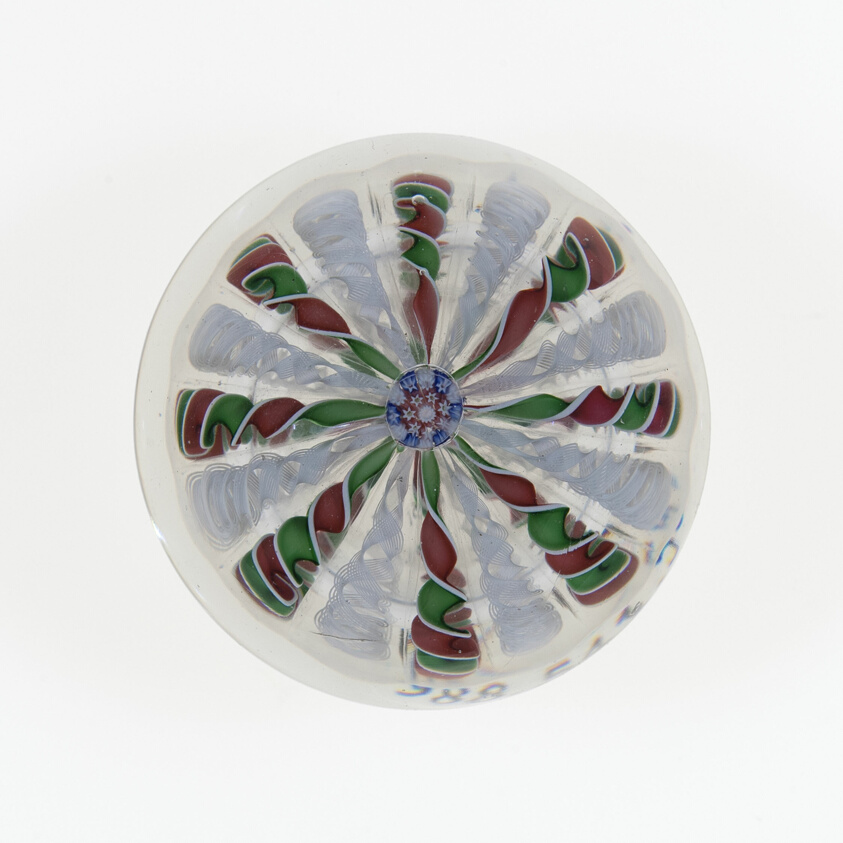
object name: Glass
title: Paperweight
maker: Saint-Louis Glassworks (Cristalleries de Saint-Louis); Lorraine, France, founded 1586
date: c. 1845–60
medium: Glass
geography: Saint-Louis-lès-Bitche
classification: paperweight; glass